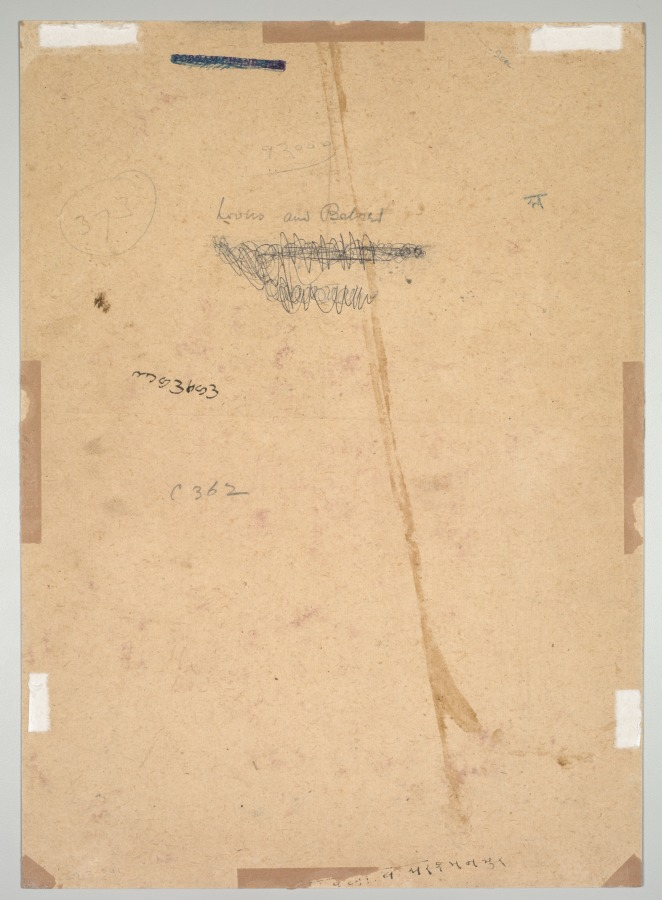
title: Lovers and beloveds: A composite of scenes from Persian, Urdu, and Sanskrit literature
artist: Chitarman II (Indian, c. 1680–с. 1750)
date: c. 1735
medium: Gum tempera and gold on paper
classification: Painting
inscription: Persian inscriptions throughout, in nasta‘liq script: Top left: The celebrated lover Ranjha; Top right, above awning: The notable ladies of the city falling into a swoon having caught sight of Joseph’s beauteous countenance; Top center, on pillar beneath canopy: The celebrated lover Vamiq; On another pillar, behind the woman’s head: The celebrated beloved ‘Azra; Upper left, on pillar: King Nala, the lover; Central figure with halo: The coming from the prison and sitting [in state] of the Lord Joseph the Prophet, with the women of the town cutting the palms of their hands and falling down unconscious; Left of center: [. . . cutting palms . . . wine cups fell from their hands . . . state of wonderment . . .]; Central pavilion at left: Sassi, the beloved the lover [Punnun]; Below central figure of Joseph: The stream of milk Shirin the beloved, weeping The death of Farhad, the lover; Lower right, in front of bearded man: Hafiz of Shiraz; Below his decanter: The stick of candy [referring to the woman with whom, according to popular lore, Hafiz was supposed to have fallen in love as a youth]; Behind the pavilion at right: Bride descending into a grave . . .; On the white railing to the left: Khwaja Bu Ali . . .; Bottom left: Queen Padmavati, the beloved, King Ratnasena, the lover; Bottom right: Majnun, the lover; On page held by Majnun: Say, “He is Allah, who is One, Allah the eternal refuge. He neither begets nor is born, Nor is there to Him any equivalent.” [Qur'an, chapter 112]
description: The figure of Joseph, identified by his halo, sits in the center near the top of this painting of heroes and heroines of ten different Persian, Urdu, and Sanskrit romances. The depicted scene occurs after Joseph has been purchased by Zulaykha in Egypt. Zulaykha, wishing to show him off to her friends and acquaintances, invites them to her home where she supplies oranges and knives. When the women see Joseph, they all are so distracted by his divine beauty that they accidentally cut their hands while peeling their oranges, but remain mesmerized by his appearance. The dramatic scene in the center is from the Persian romance of Khusrau and Shirin, in which Farhad, a stonecutter who loved Shirin, threw himself to his death from a mountaintop after hearing news of Shirin’s death, falsely sent to him from his rival Khusrau. The emaciated Majnun is in the lower right corner. Every vignette has been identified with a tiny Persian inscription.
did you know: Below the bearded poet Hafiz is the woman he loved; her name was Stick of Candy.